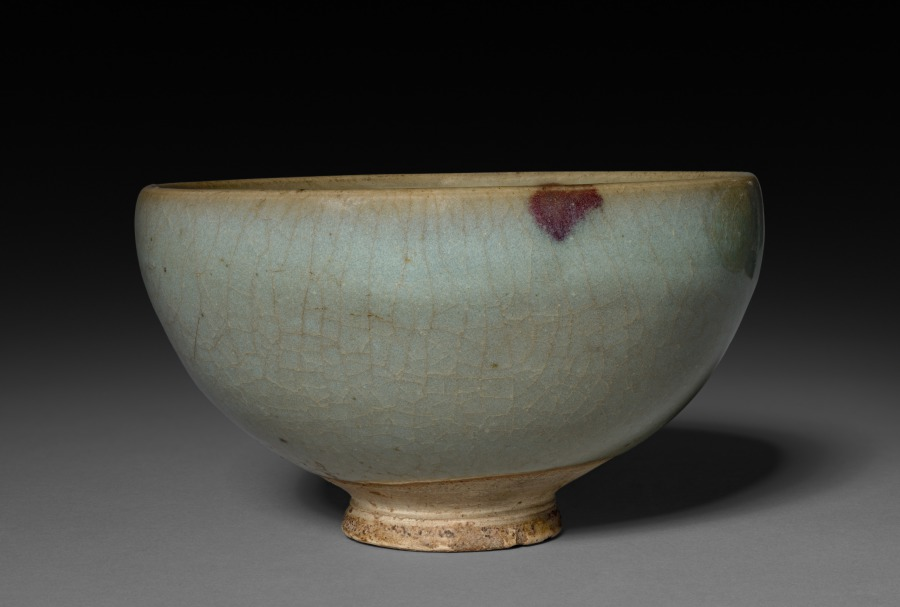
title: Bowl: Jun ware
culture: Northern China, Jin dynasty (1115-1234) - Yuan dynasty (1271-1368)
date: 13th - 14th century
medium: glazed buff stoneware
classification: Ceramic